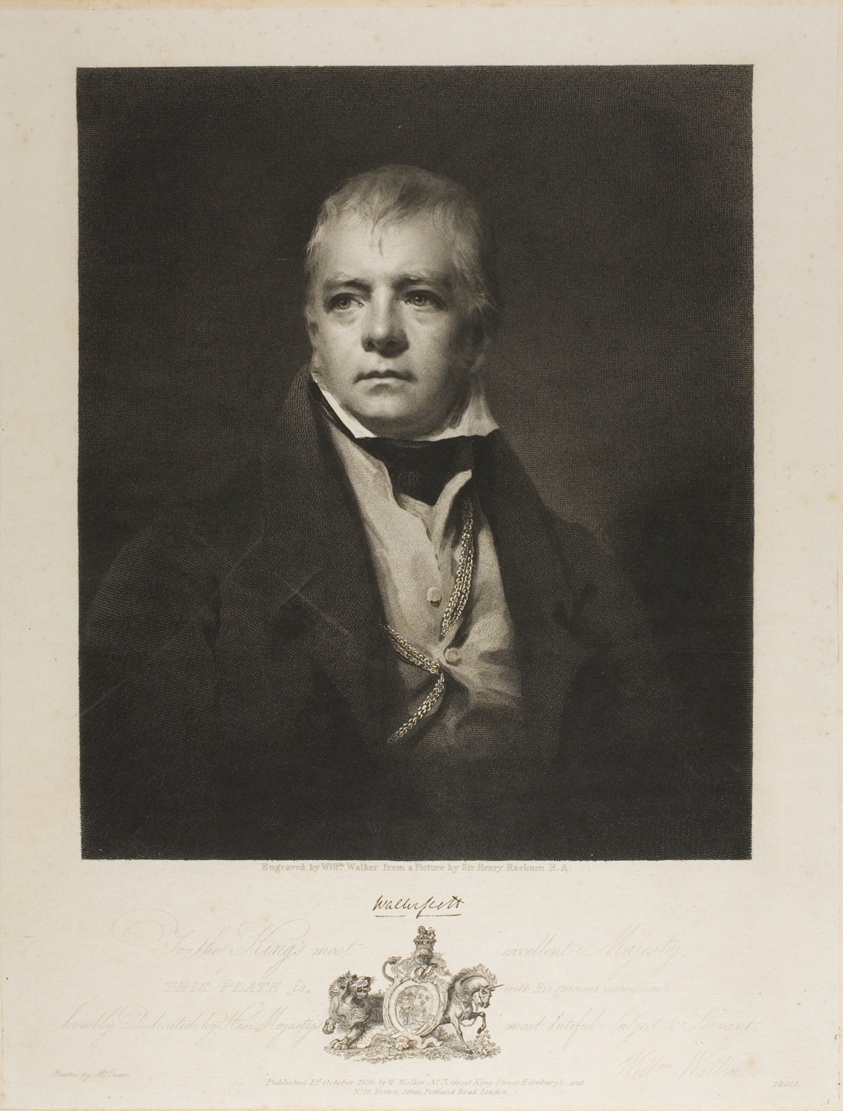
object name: Print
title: Sir Walter Scott Bart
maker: William Walker (English, 1791-1867); after Sir Henry Raeburn (Scottish, 1756-1823)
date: 1826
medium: Engraving in black on ivory wove paper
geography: England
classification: engraving; print; prints and drawing